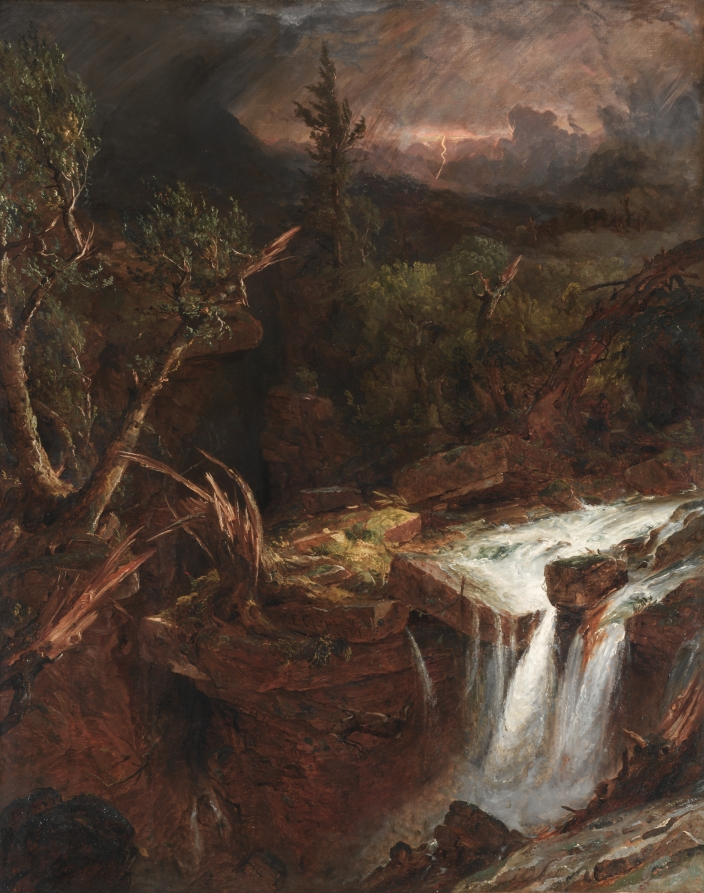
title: The Clove - A Storm Scene in the Catskill Mountains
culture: America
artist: Jasper F. Cropsey (American, 1823–1900)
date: 1851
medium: oil on canvas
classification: Painting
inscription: Signed lower center: J. F. Cropsey / 1851